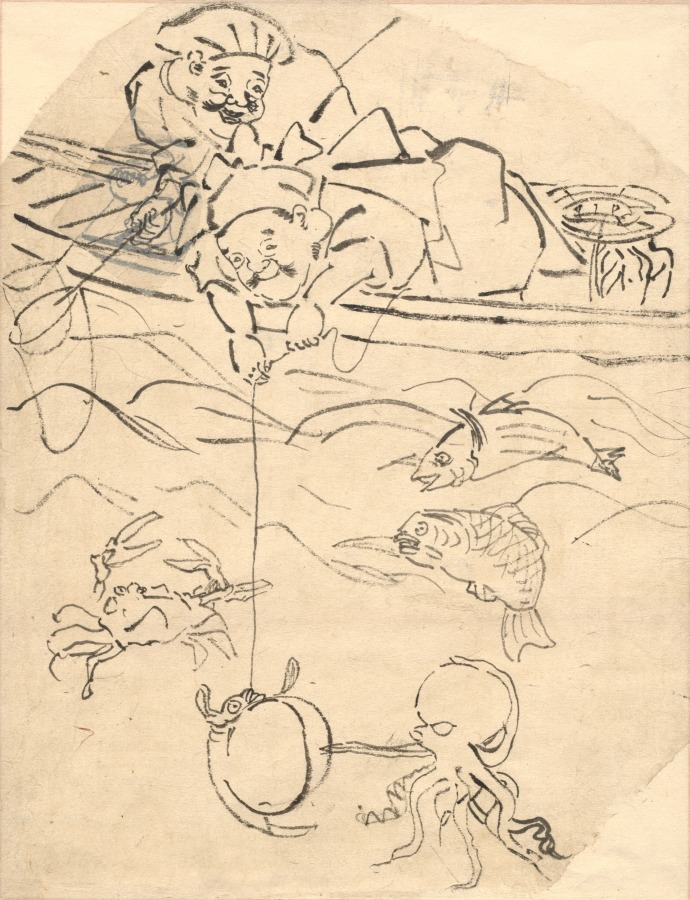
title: Daikoku and Ebisu, Two of the Seven Gods of Happiness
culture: Japan, Edo period (1615–1868)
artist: Utagawa Kuniyoshi (Japanese, 1797–1861)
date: c. 1830s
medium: ink on paper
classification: Drawing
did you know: The artist has used a small paper patch inked with a hand to change the hand position of the figure holding the net.